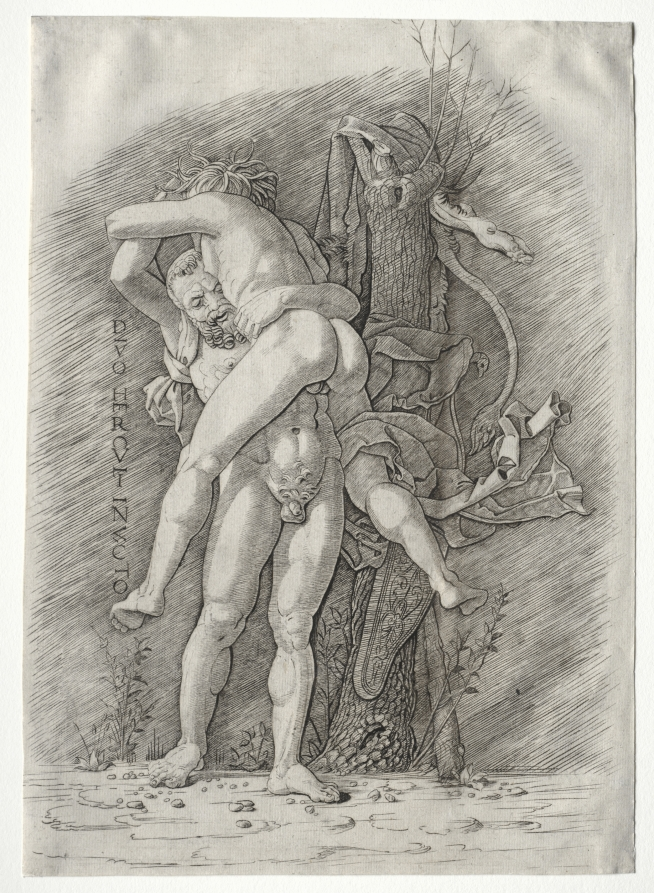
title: Hercules and Antaeus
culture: Italy, 15th century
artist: school of Andrea Mantegna (Italian, about 1431–1506)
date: 1400s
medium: engraving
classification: Print